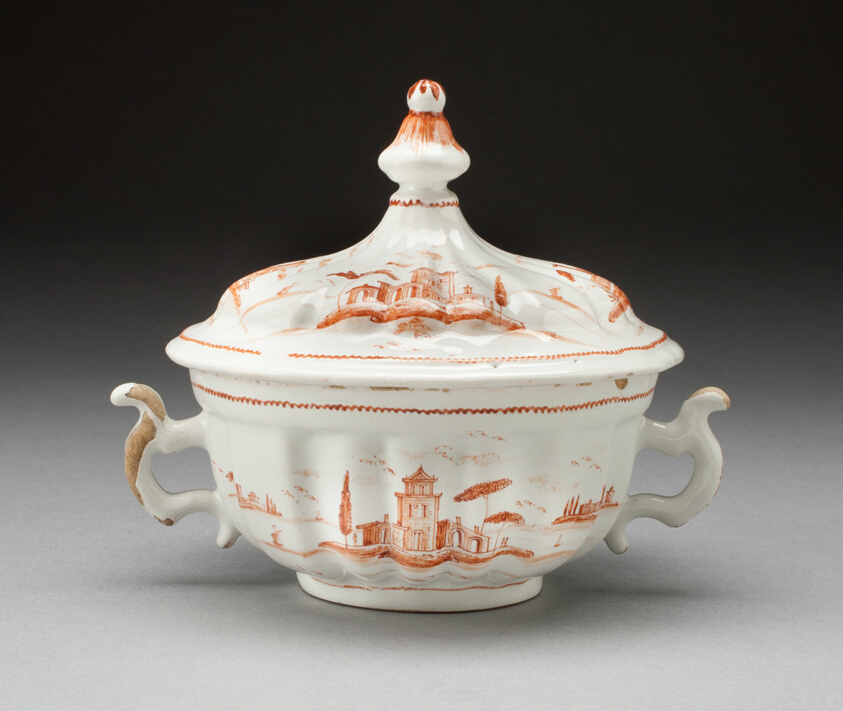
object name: Ceramics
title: Covered Bowl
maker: Italy, Venice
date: Mid 18th century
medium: Tin-glazed earthenware decorated with iron red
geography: Venice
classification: bowl; earthenware; dish (vessel); european decorative arts; ceramics